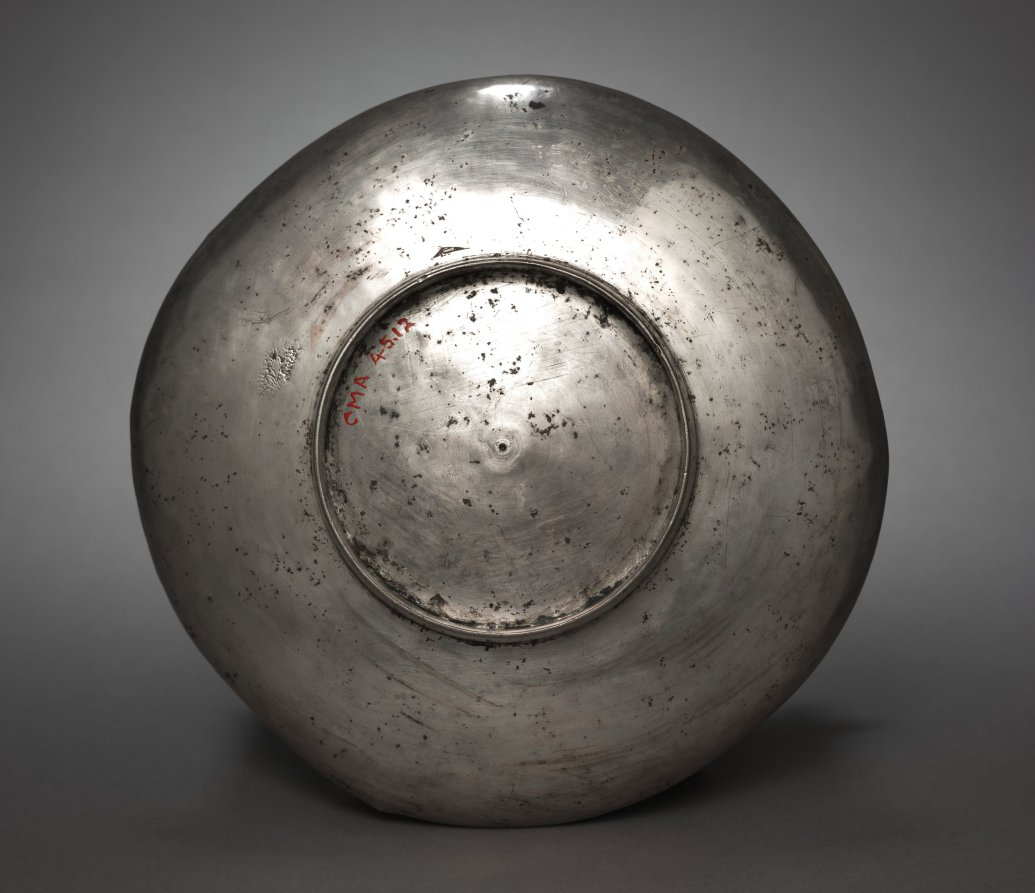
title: Silver Dish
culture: Iran, Sasanian Empire (224–651 CE)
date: 226–641 CE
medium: silver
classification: Metalwork